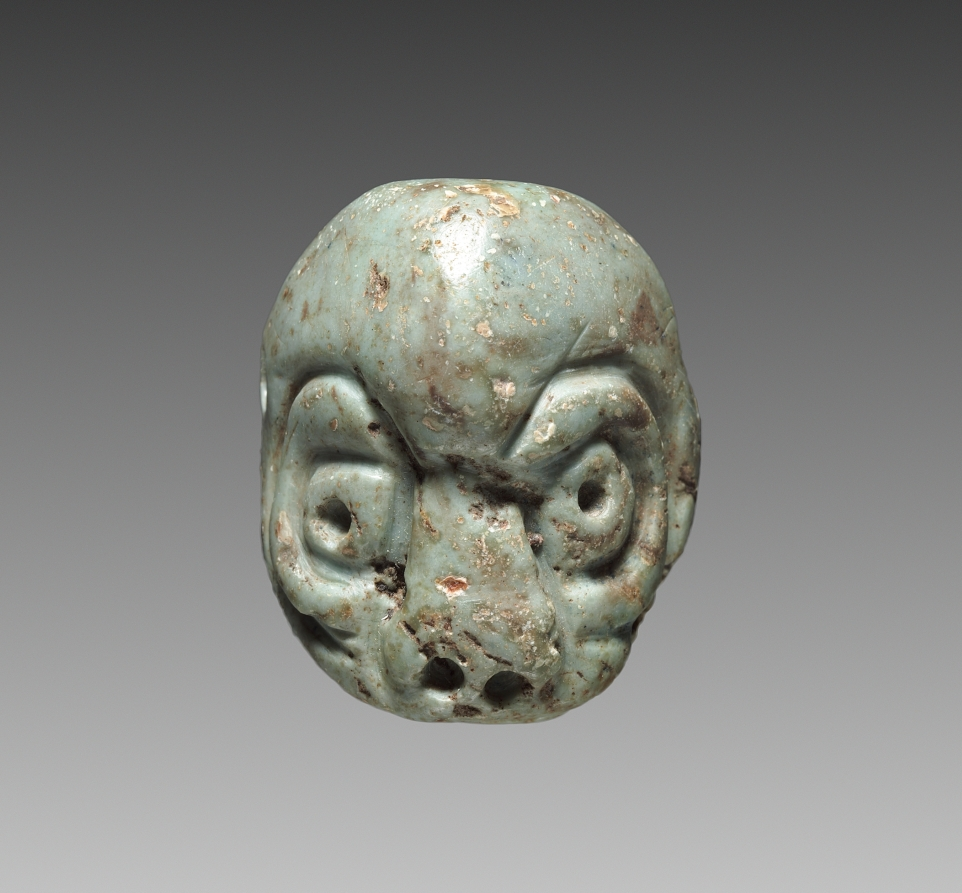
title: Monkey Head Pendant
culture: Pre-Columbian style, 20th century (?)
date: 20th Century(?)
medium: green stone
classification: Jewelry